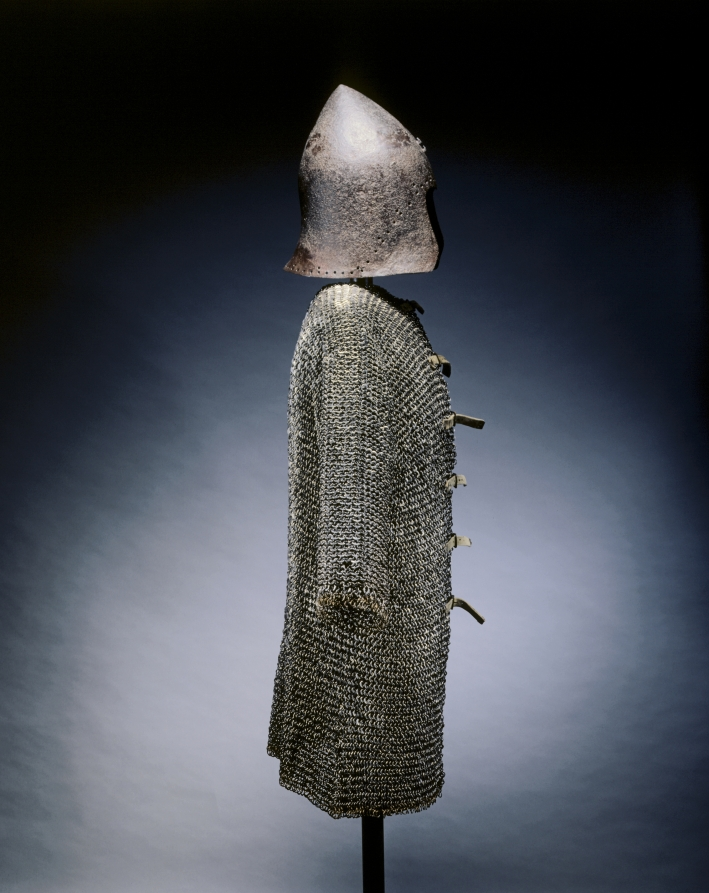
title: Barbute (from the Venetian Garrison at Chalcis)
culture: North Italy, 14th-15th century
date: c. 1350–1420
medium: iron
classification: Arms and Armor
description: This is a rare example of a type of helmet used from about 1350 to 1480. Its conical shape deflected glancing blows to the head. Italian chronicles refer to professional men-at-arms as barbuti. The word derives from the Italian barba, or beard, a reference to the hood of mail often attached to these early helmets. The row of small holes along the face opening and neck were for the attachment of the hood and lining.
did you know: This helmet and a number of others were apparently excavated from the Venetian garrison at Chalcis on the Greek island of Euboea.